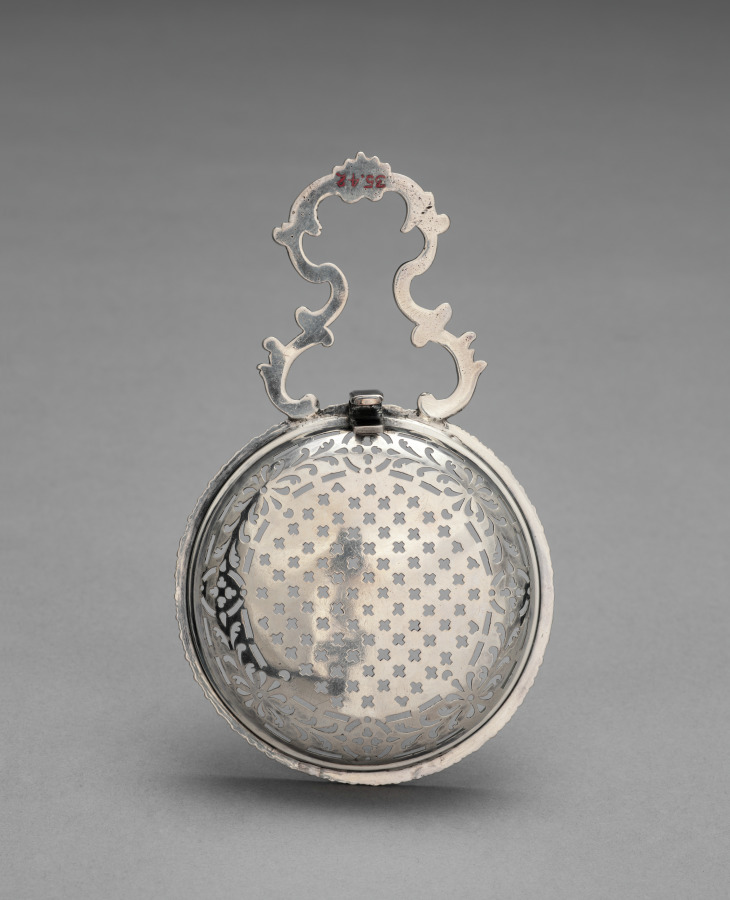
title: Strainer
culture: England, London, 18th century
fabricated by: Samuel Herbert (British)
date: 1760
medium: silver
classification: Silver